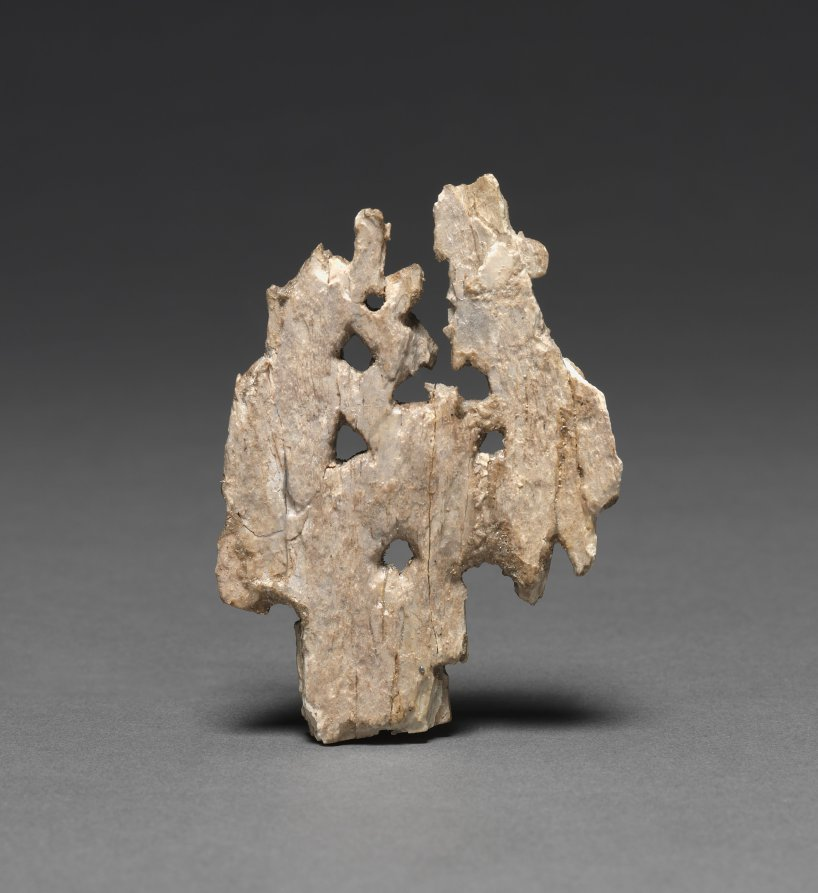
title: Ladies at Toilette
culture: Afghanistan, Begram, Kushan period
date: c. 50–200 CE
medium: ivory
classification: Ivory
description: This ivory carving was made to sheath wooden furniture made in India for trade along the Silk Road, which stretched from Rome to China. One lady adjusts the coiffure of another; a wicker stool is between them. Indian ivory-faced furnishings—along with lacquer boxes from China and painted glass from Rome—were found in an extraordinary deposit of luxury goods at a site called Begram.